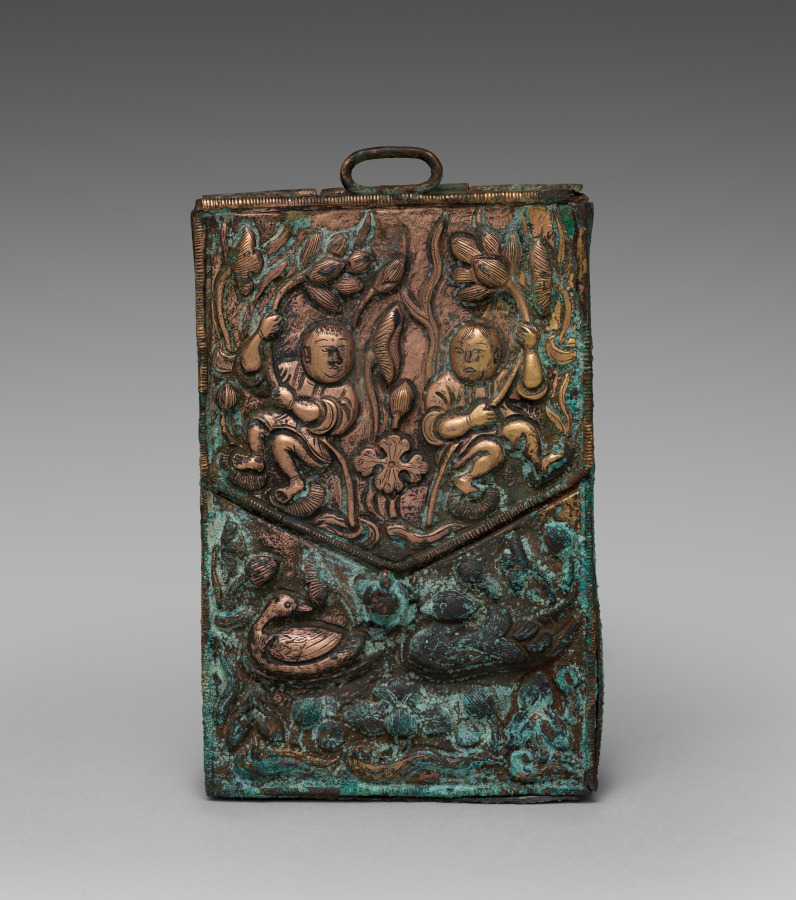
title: Sutra Container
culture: Korea, Goryeo dynasty (918–1392)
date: 1100s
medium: gilt bronze with incised and high relief decoration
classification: Metalwork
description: This is a portable container once used to preserve a miniature Buddhist sacred text. Created by hammering the reverse, high-relief designs on both the front and back of the case depict a peaceful pond where young boys are holding giant lotus flowers in their hands, and a pair of mandarin ducks are swimming. Probably the playful boys represent newly reborn souls in the Pure Land.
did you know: This is a portable container once used to preserve a miniature Buddhist sacred text, particularly useful for traveling Buddhist pilgrims.